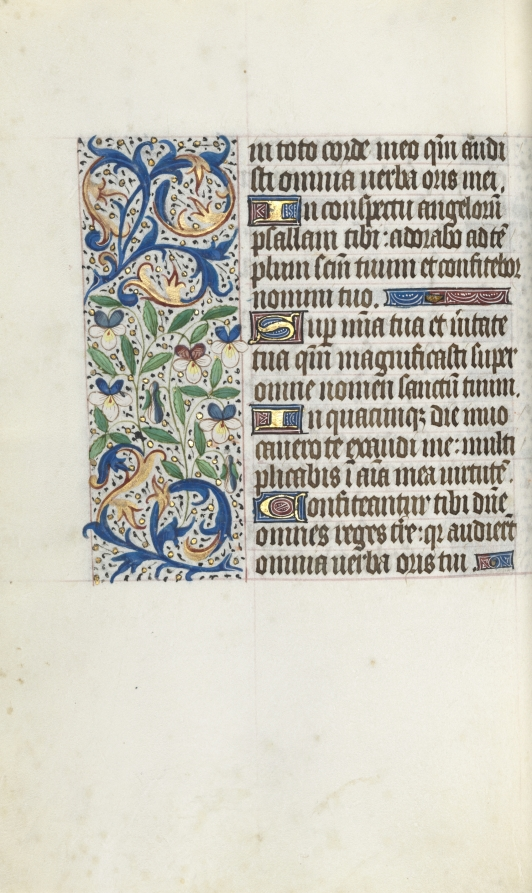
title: Book of Hours (Use of Rouen): fol. 106r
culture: France, Rouen, 15th century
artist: Master of the Geneva Latini (French, active Rouen, 1460–80)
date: c. 1470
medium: ink, tempera, and gold on vellum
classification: Bound Volume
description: In the late 1400s and early 1500s Rouen was an established and important center of book production. The city’s cathedral had a wealthy chapter that spent large sums of money to commission books and to maintain its extensive library. The stationers and booksellers would have likely been concentrated in or near the cathedral precinct. This artist, named after a manuscript now in Geneva, was Rouen’s principal illuminator during the second half of the 1400s.